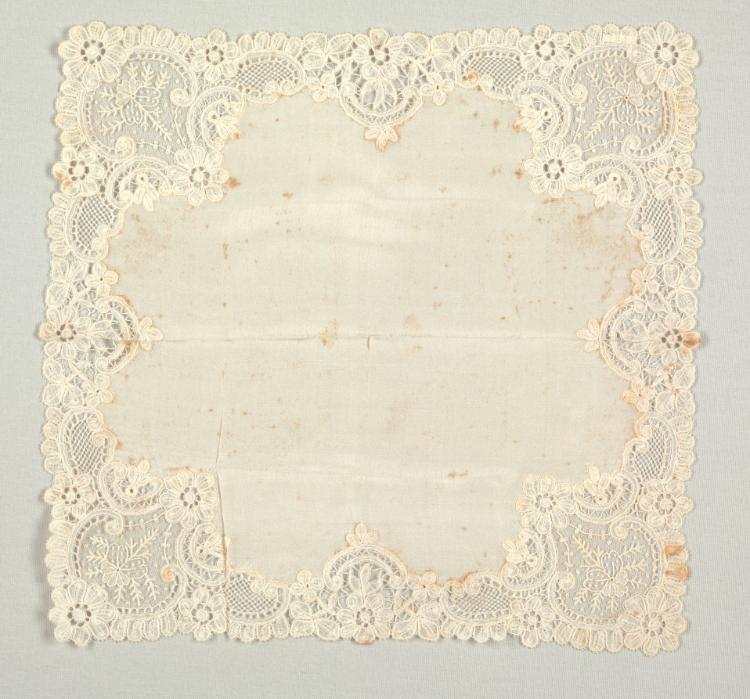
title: Lace Handkerchief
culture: Belgium, Brussels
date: 1900–1935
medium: Crepe de chine center with bobbin lace (Duchesse lace) border and corner medallions of needle lace (point de gaze) and embroidery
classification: Lace